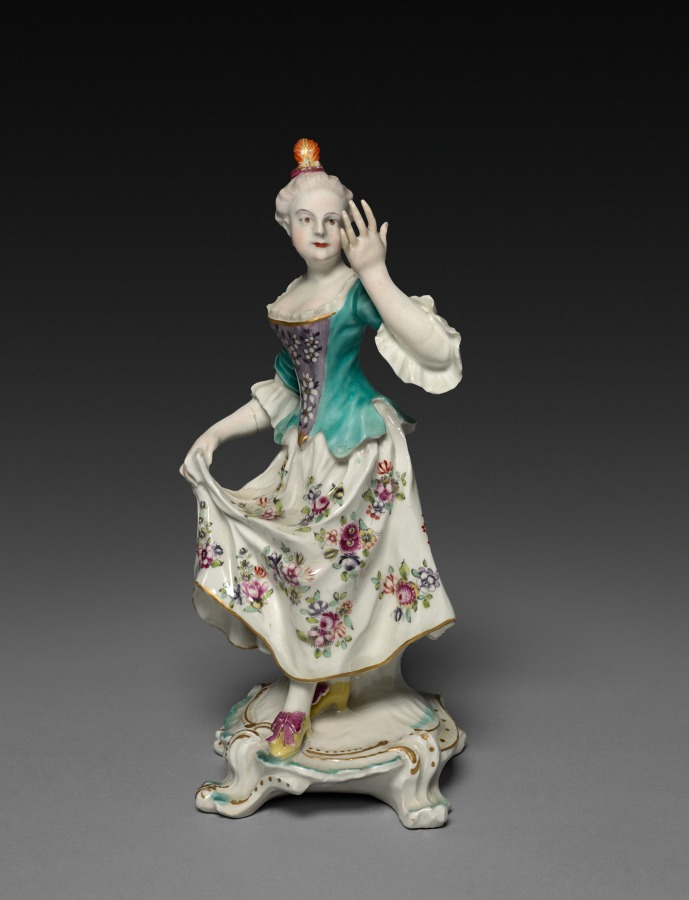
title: Dancer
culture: England, Derby, 18th century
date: c. 1760–1765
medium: soft-paste porcelain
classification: Ceramic